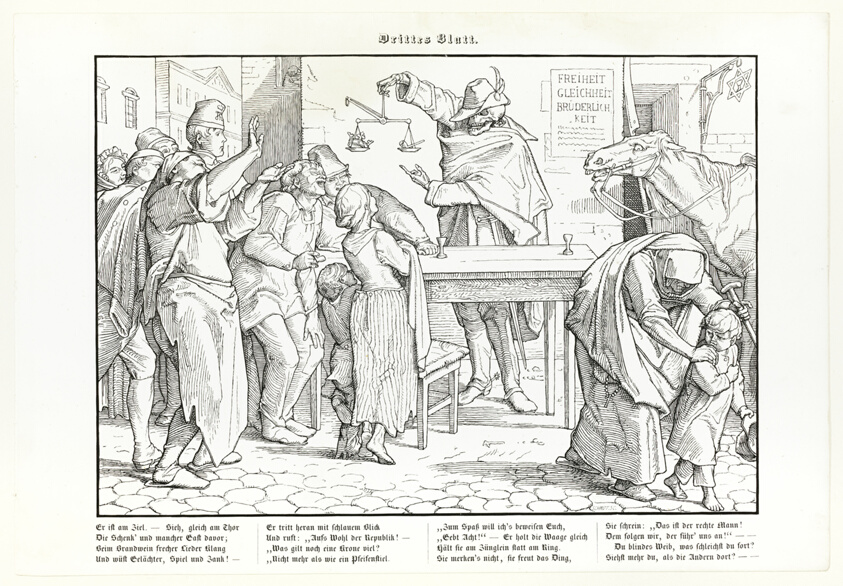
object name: Print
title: Auch ein Todtentanz, plate III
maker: Alfred Rethel (German, 1816-1859)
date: 1848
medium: Wood engraving in black on ivory wove paper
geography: Germany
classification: woodcut; print; prints and drawing